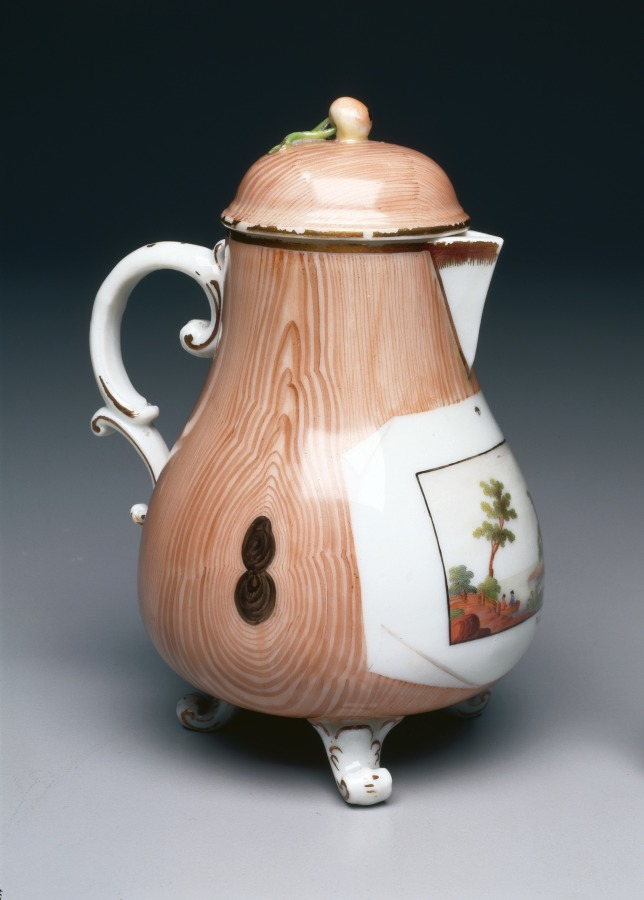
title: Covered Cream Jug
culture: France, 18th century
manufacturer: Niderviller Factory (French)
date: c. 1775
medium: hard-paste porcelain with enamel and gilt decoration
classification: Ceramic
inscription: inscribed at lower right corner of trompe l'oeil print: Niderviller.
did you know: Cream jugs with lids or covers usually held warm cream for coffee or tea.